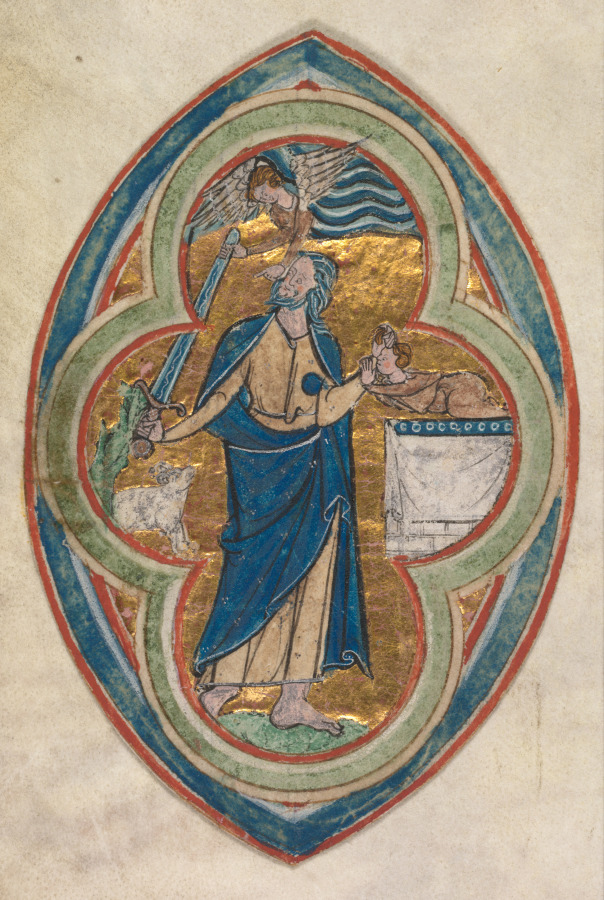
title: Miniature Excised from a Compendium in historiae genealogia Christi by Peter Poitiers: The Sacrifice of Isaac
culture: England, London, 13th century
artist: workshop of William de Brailes (English, active c. 1230)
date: 1200–1250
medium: ink, tempera, and gold on vellum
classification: Manuscript